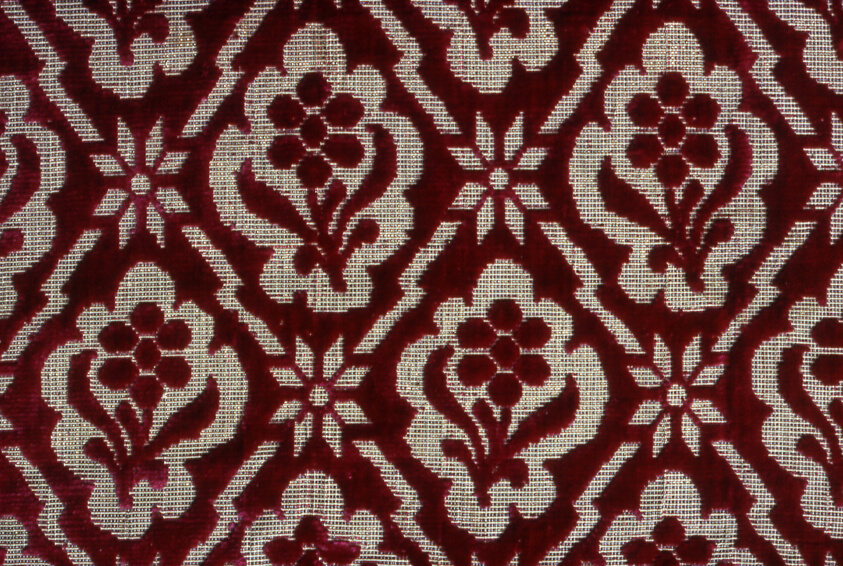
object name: Textile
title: Fragment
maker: Italy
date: 1601/50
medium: Silk, cut, voided velvet with additional patterning wefts of cut gold foil against plain weave foundation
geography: Italy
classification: textile; weaving - velvet